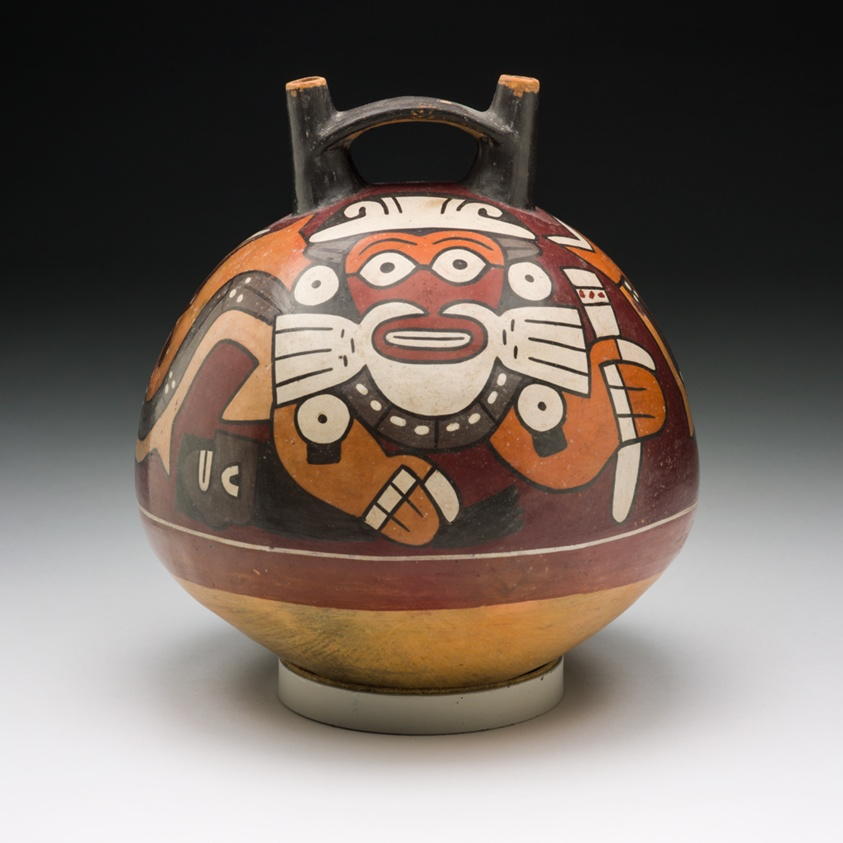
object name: Vessel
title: Vessel with Marine Beings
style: nazca, early intermediate period, Pre-Columbian, americas, andes, Arts of the Americas, andean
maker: Nazca; South coast, Peru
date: 50–500 CE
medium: Ceramic and pigment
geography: Peruvian South Coast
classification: earthenware; art of the americas; ceramics; vessel; masks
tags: people, animals, composite, fish, sacrifice, warriors, costumes, masks